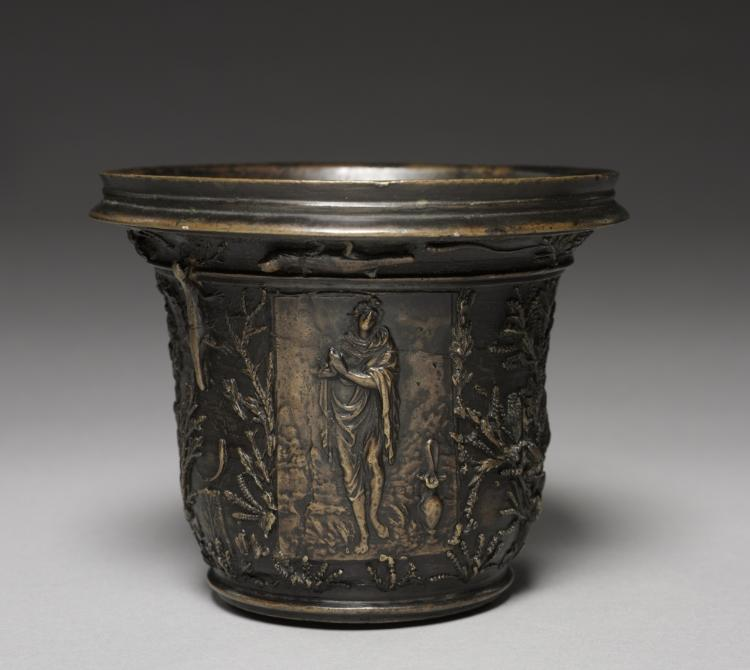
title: Mortar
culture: Germany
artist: workshop of Wenzel Jamnitzer I (German, 1508/09–1585)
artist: with plaquettes cast after models by Peter Flötner (German, 1485–1546)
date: c. 1550–1560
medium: bronze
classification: Sculpture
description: Three reliefs curiously combine faith, hope, and vanity. They were made after works by Peter Flötner (more refined plaquettes by the artist are also in the museum's collection), then incorporated into the vessel. The plants and small reptiles were cast from life, an example of the strong interest in natural history in Renaissance Nuremberg. This tradition relates closely to the French ceramics by Palissy, also in the collection, which likewise incorporate natural specimens.